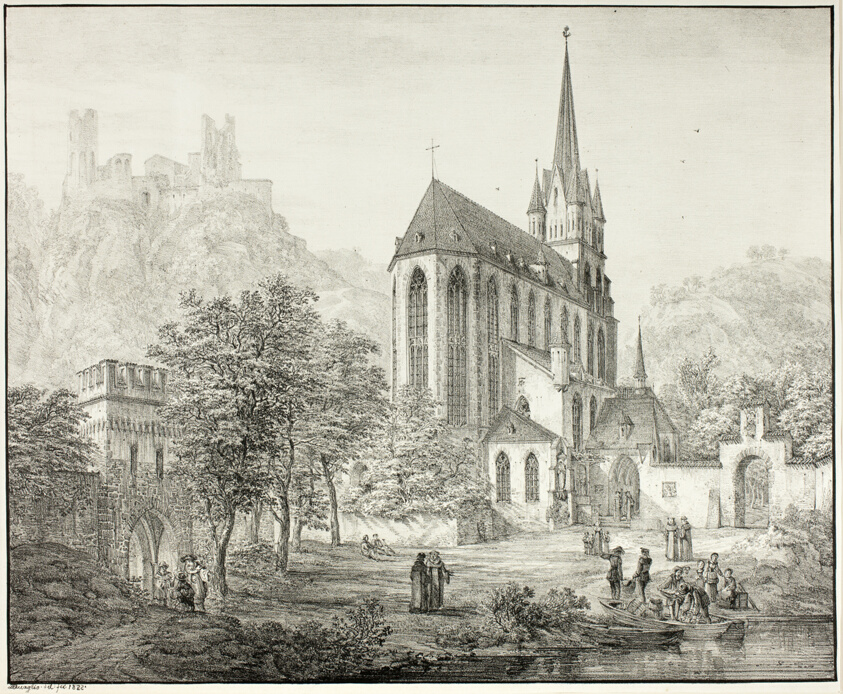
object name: Print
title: Collegiate Church of Our Lady, with Castle Schoenberg at Oberwesel on the Rhine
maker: Domenico Quaglio II; German, 1787-1837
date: 1822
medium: Lithograph in black on ivory wove paper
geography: Germany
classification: lithograph; print; prints and drawing